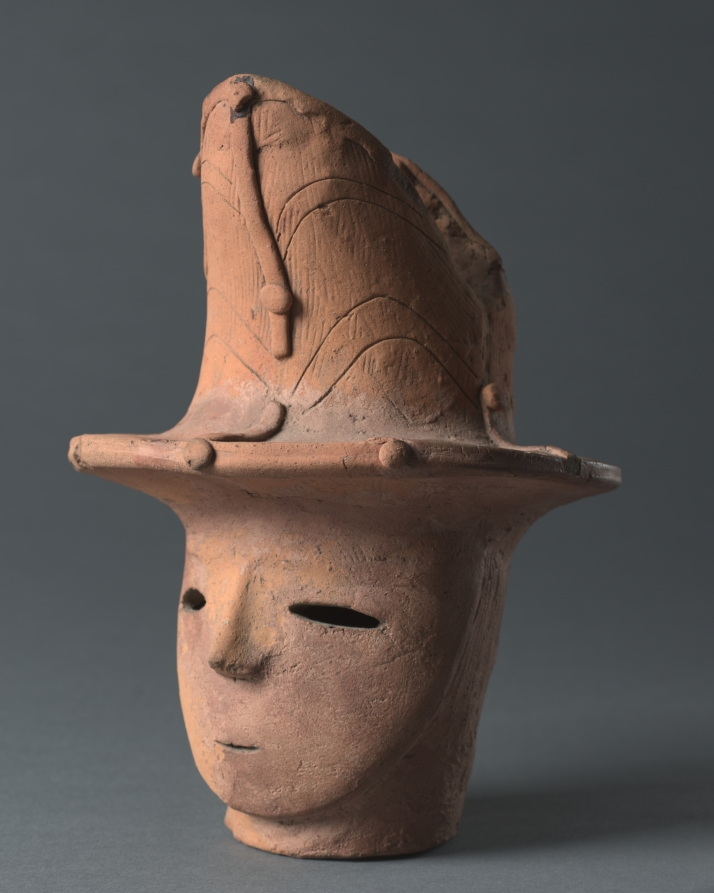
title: Male Haniwa Head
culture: Japan, Kofun period (300–710 CE)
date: c. 500–600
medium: earthenware with ochre wash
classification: Sculpture